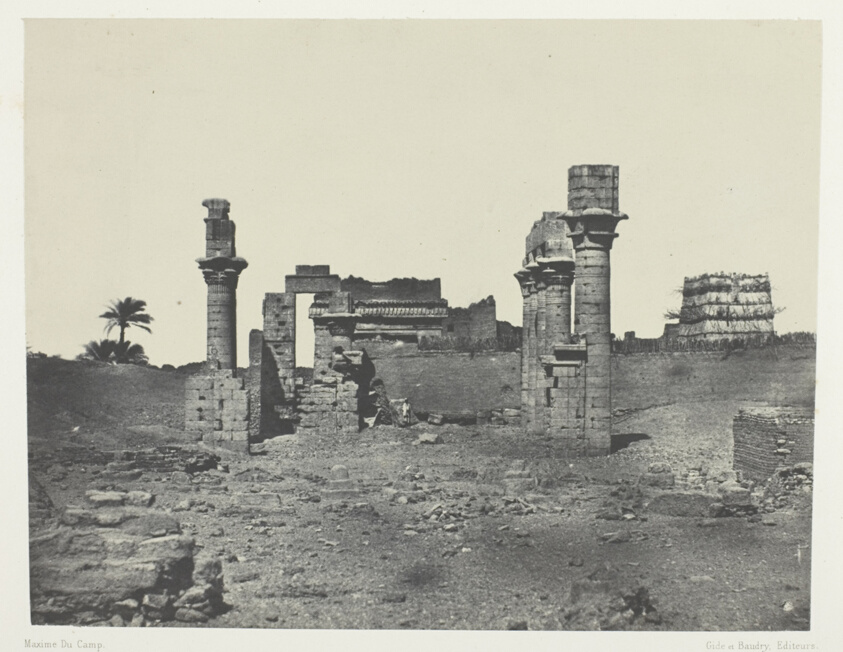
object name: Photograph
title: Temple d'Hermontis, Haute-Egypte, plate 63 from the album "Egypte, Nubie, Palestine et Syrie" (1852)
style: 19th century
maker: Maxime Du Camp (French, 1822–1894)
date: 1849/51, printed 1852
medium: Salted paper print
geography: France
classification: salted paper print; photographic process; photography; photograph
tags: Collected by Hugh Edwards, Egypte, Nubie, Palestine et Syrie